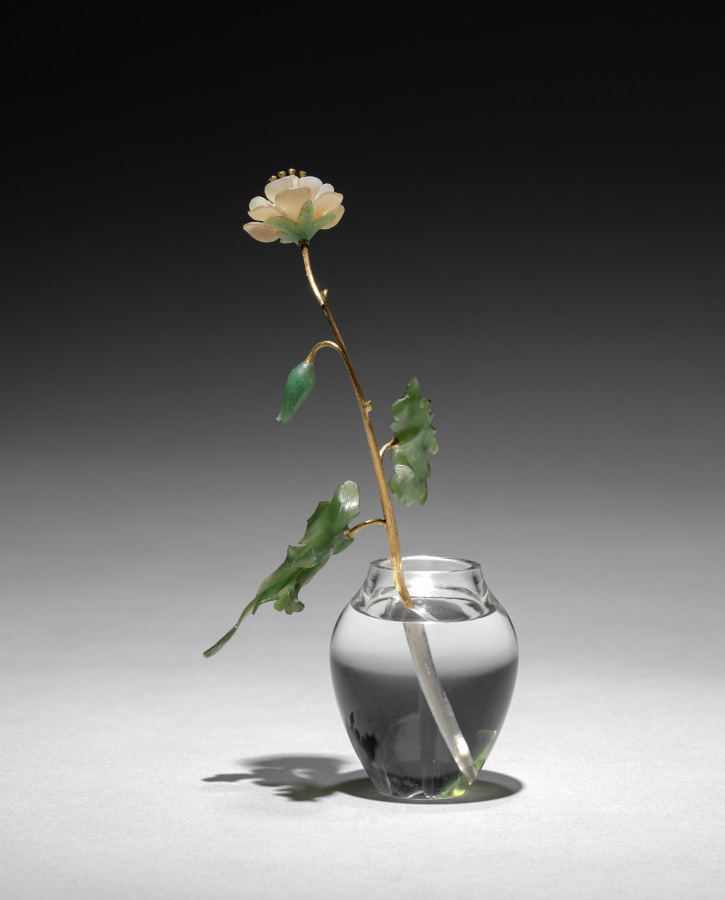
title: Flower Study of an Anemone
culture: Russia, St. Petersburg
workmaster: Henrik Wigström (Russian, 1862–1923)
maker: House of Fabergé (Russian, 1842–1918)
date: c. 1905–15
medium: mat white stone, gold, sapphires, jade, rock crystal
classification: Miscellaneous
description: This flower study depicts a wild anemone in bloom. Fabergé’s inspiration for his flower studies is said to have come from the floral brooches of precious stones that were made in the 1700s for Catherine the Great as well as from the Japanese art of flower arranging, known as ikebana. Small and delicate, Fabergé’s flower studies were given as intimate gifts to friends by the tsarina and others in the court. She also liked to take them around to wherever the imperial family was residing as a reminder of spring during the harsh Russian winters.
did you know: The stems of Fabergé’s flower studies are set into little basins carved from rock crystal to resemble pots of water.